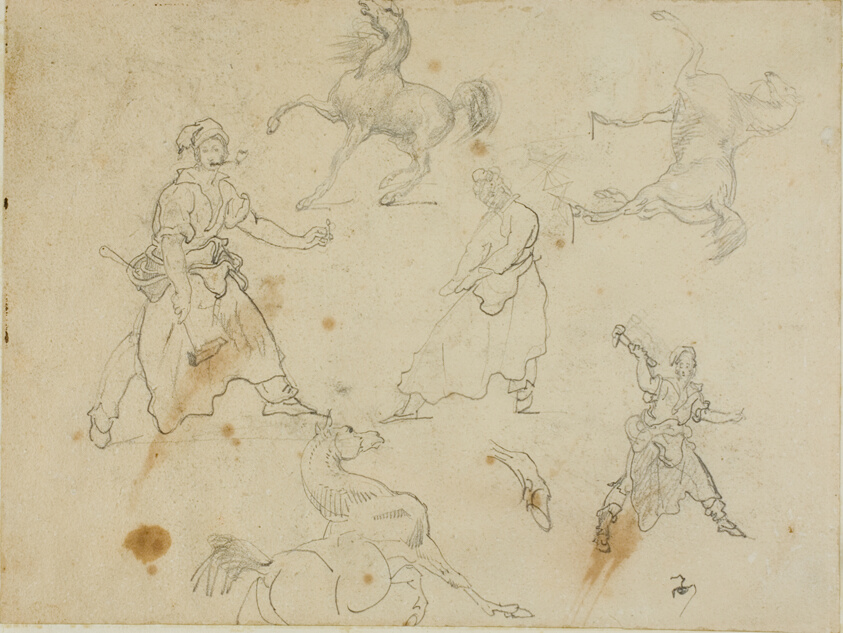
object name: Drawing and Watercolor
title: Studies of Blacksmiths and Horses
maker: Jean Louis André Théodore Géricault (French, 1791-1824)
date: 1813/14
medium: Graphite on cream wove paper, perimeter mounted on ivory laid paper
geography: France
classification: drawings (visual works); prints and drawing